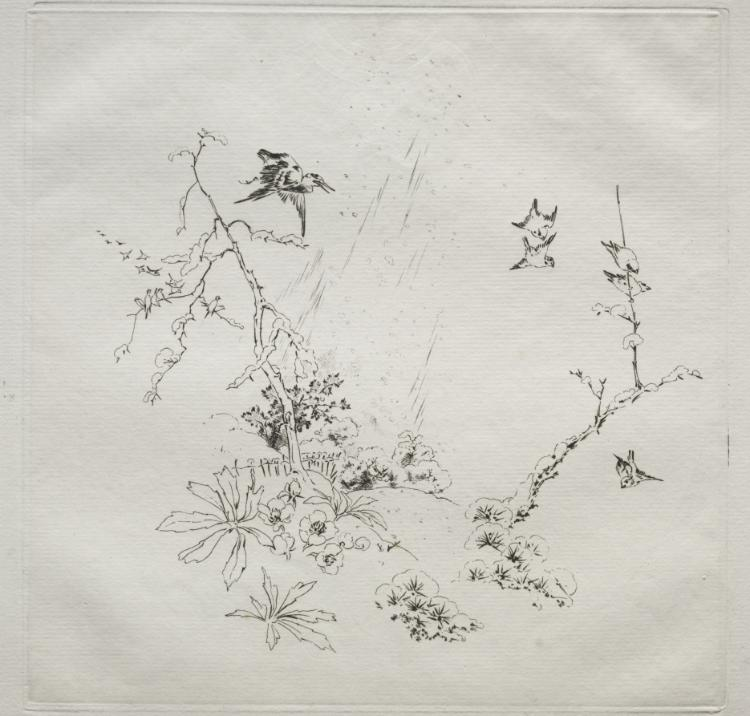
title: Parisian Service (Haviland service): Snow (no. 6)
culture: France, 19th century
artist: Félix Bracquemond (French, 1833–1914)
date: 1875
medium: etching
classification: Print